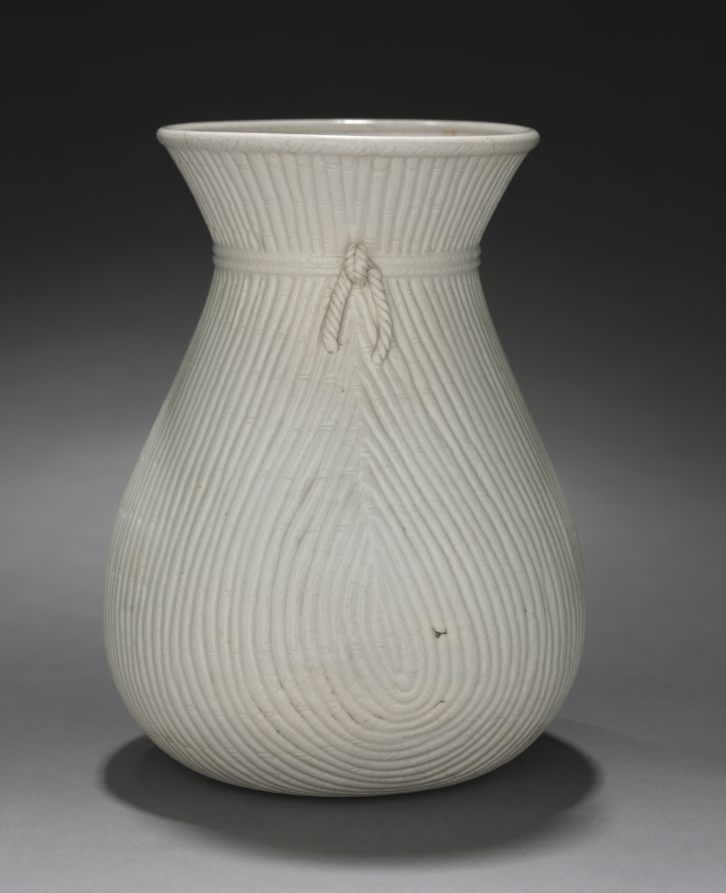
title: Basket Shaped Vase: Ding Ware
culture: China, Ming dynasty (1368–1644)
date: 1600s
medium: glazed porcelain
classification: Ceramic